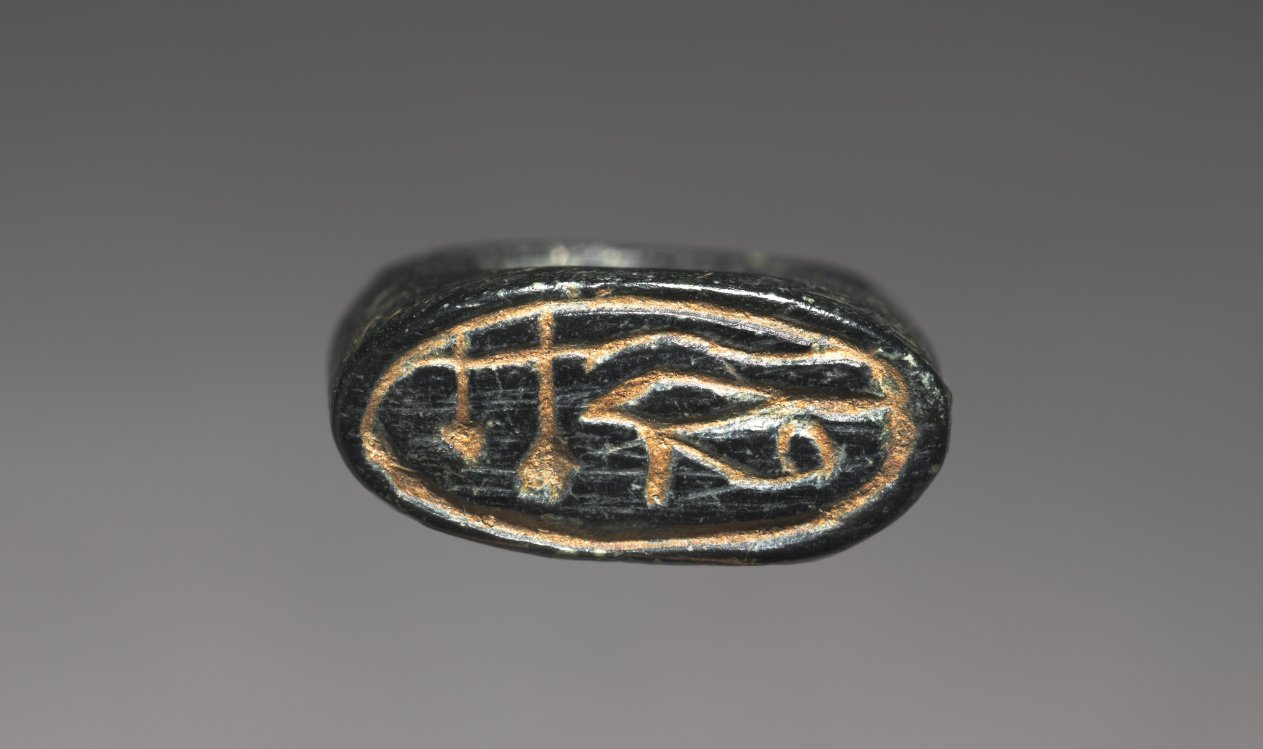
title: Child's Finger Ring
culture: Egypt, New Kingdom (1540–1069 BCE), Dynasty 18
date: 1540–1296 BCE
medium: wood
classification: Jewelry